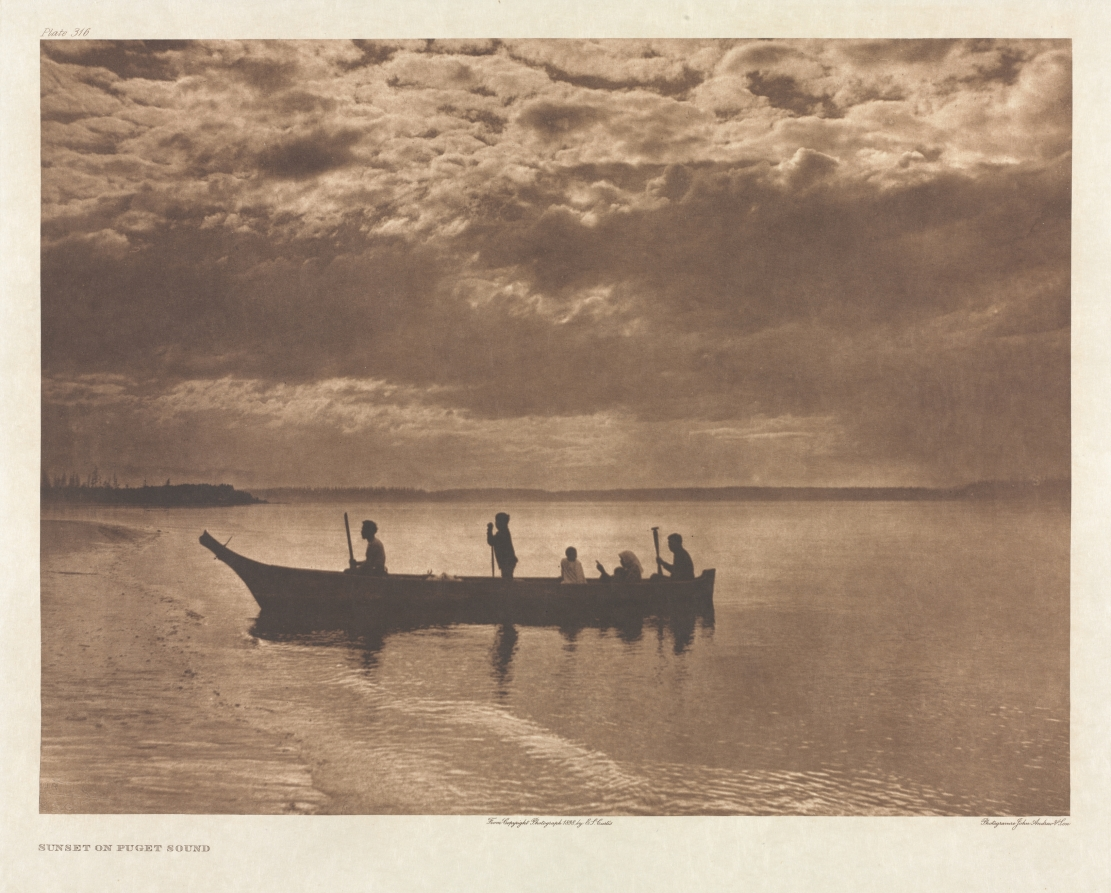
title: Portfolio IX, Plate 316: Sunset on Puget Sound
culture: America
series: The North American Indian: being a series of Portfolios picturing and describing the Indians of the United States, the Dominion of Canada, and Alaska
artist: Edward S. Curtis (American, 1868–1952)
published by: The University Press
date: 1898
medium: photogravure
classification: Portfolio